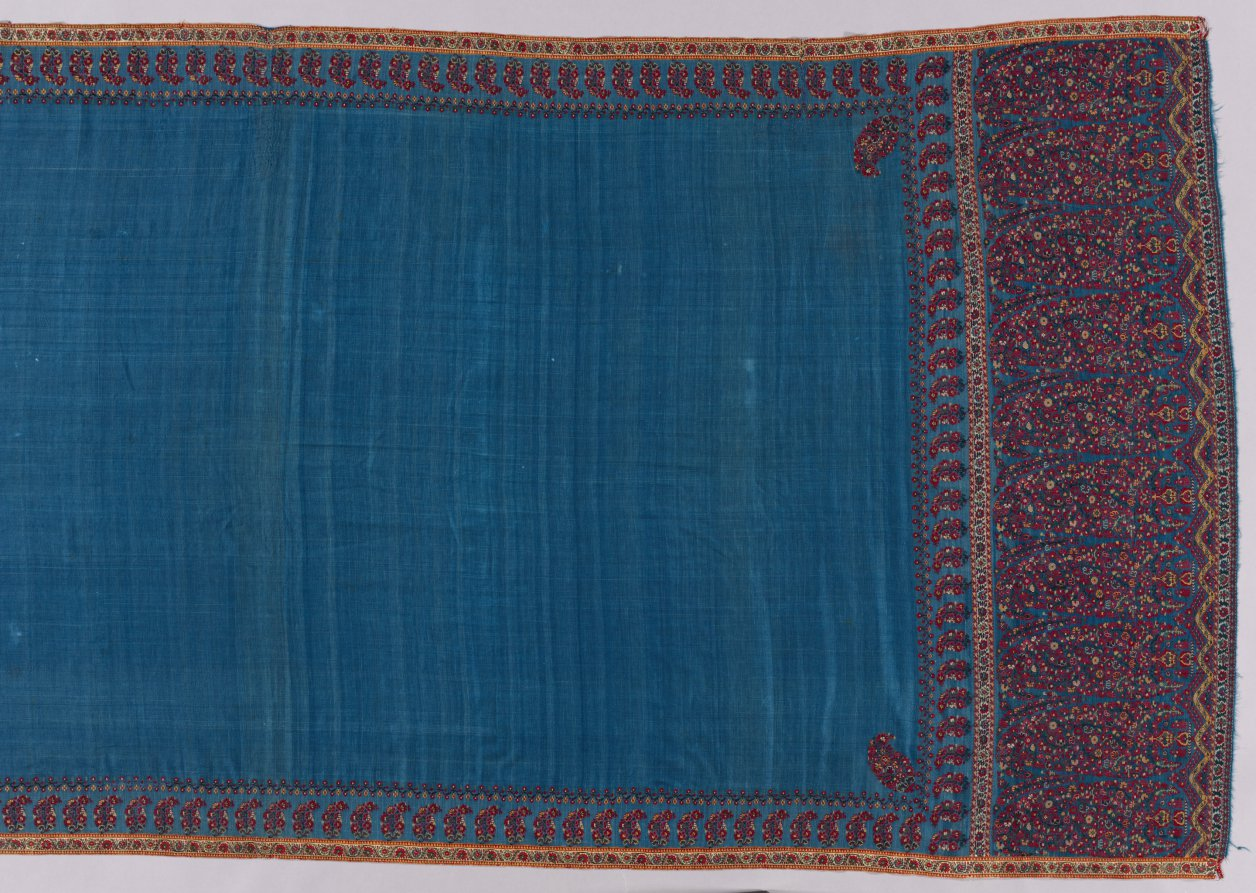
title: Shawl with boteh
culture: India, Kashmir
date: 1820–1830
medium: 2/2 twill tapestry weave, double interlocked: wool, possibly pashmina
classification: Textile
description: Thousands of luxurious shawls imported from Kashmir, India, were status symbols that European-manufactured imitations could not equal. Those woven in Paisley, Scotland, gave rise to the popular term paisley. Their representation in portraits records the evolution of shawl fashions, which helps to date surviving examples. The coveted quality of Kashmir shawls was achieved with luxurious fine goat hair woven in twill tapestry to form small colorful blossoms. Such shawls are lightweight, supple, and warm. A plethora of blossoms arranged in small vases on stands form the large paisley or boteh motifs, while smaller versions enliven the sides of the field. Such floral displays evolved from blossoming plants possibly in 16th-century India.